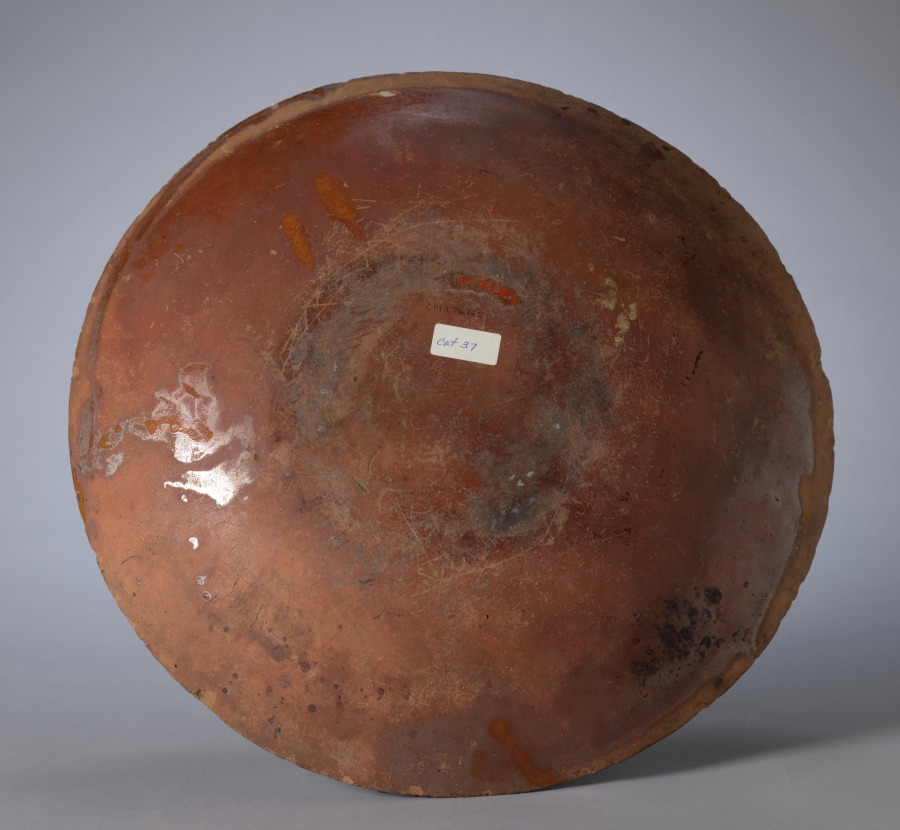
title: Slipware Dish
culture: America, Pennsylvania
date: early 1800s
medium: red terracotta with yellow and transparent glaze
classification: Ceramic